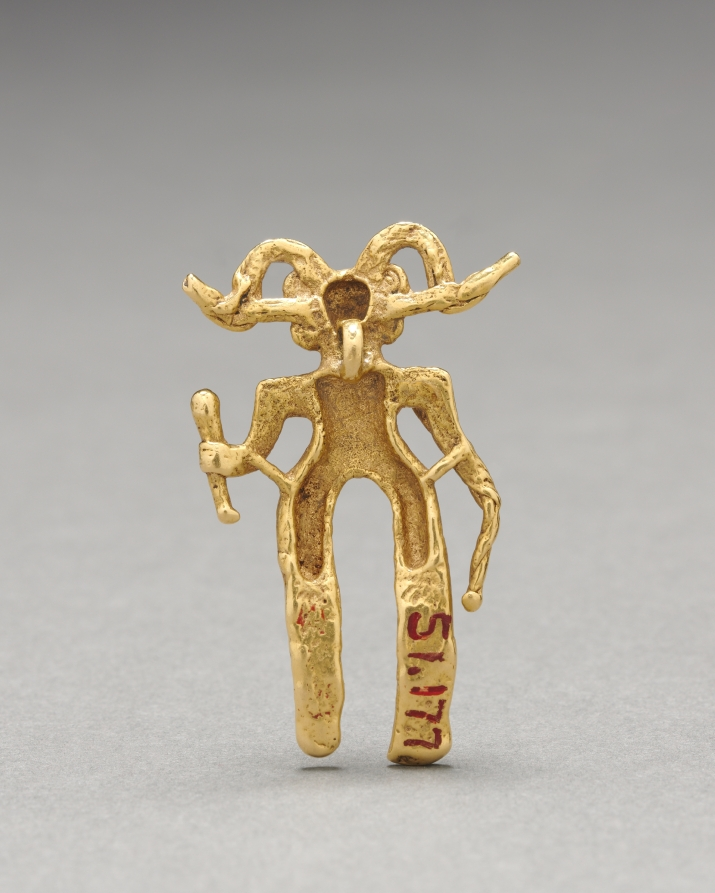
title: Figurine Pendant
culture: Western Panama, Veraguas-Gran Chiriquí Style, 11th-16th century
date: c. 1000–1500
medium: cast gold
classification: Metalwork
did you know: In the Panama-Costa Rica region, gold ornaments were associated with political and religious authority.